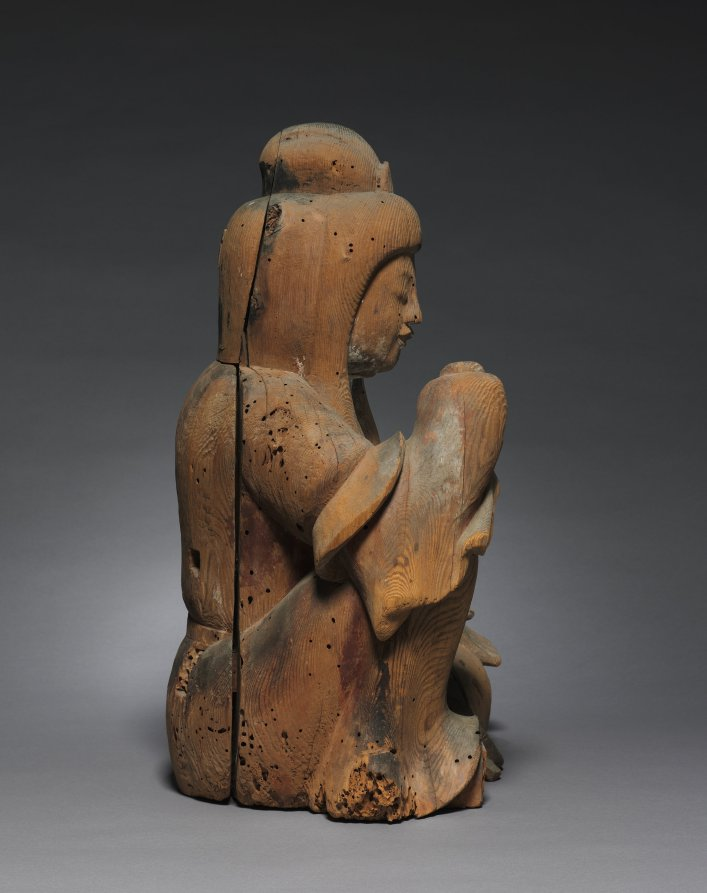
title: Shinto Deity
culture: Japan, Heian period (794–1185)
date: 900s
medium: wood, with traces of polychromy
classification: Sculpture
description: This sculpture represents a kami, the name for deities associated with the Japanese religious tradition called Shinto. It is said to have originally been created for the Usa Hachiman Shrine in Oita on the island of Kyushu. The shrine houses four main kami: Hime Okami, who assists those engaged in agriculture andsea travel; the legendary 5th-century emperor Ojin deified as the kami Hachiman; Empress Jingu; and the kami of Mount Kawara, who aids copper miners. The pose of this figure, dressed in robes reminiscent of a Tang dynasty court lady, suggests that she may have been an attending deity.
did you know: Traces of pigment on the surface of this sculpture indicate it was once painted.